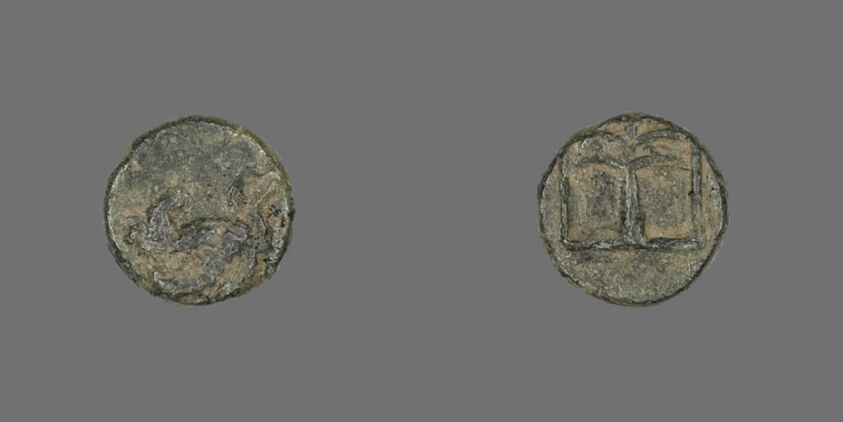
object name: Coin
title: Coin Depicting Pegasus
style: greek, ancient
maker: Greek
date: 400-310 BCE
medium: Bronze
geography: Ancient Greece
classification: coin; ancient art